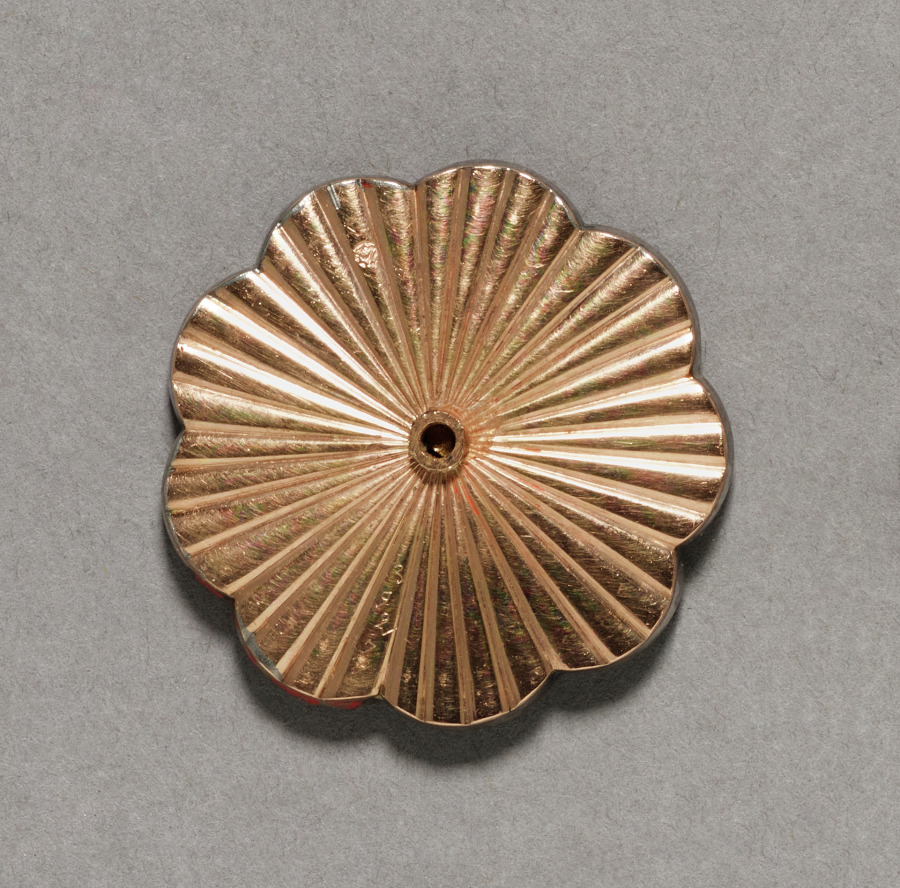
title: Button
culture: Russia, St. Petersburg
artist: firm of Peter Carl Fabergé (Russian, 1846–1920)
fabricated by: August Wilhelm Holmström (Russian, 1929–1903)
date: after 1896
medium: gold, enamel, diamonds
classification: Miscellaneous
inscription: inscribed: double-headed eagle; Fabergé; St. Petersburg, Moscow (all in Cyrillic; inside lid of box).